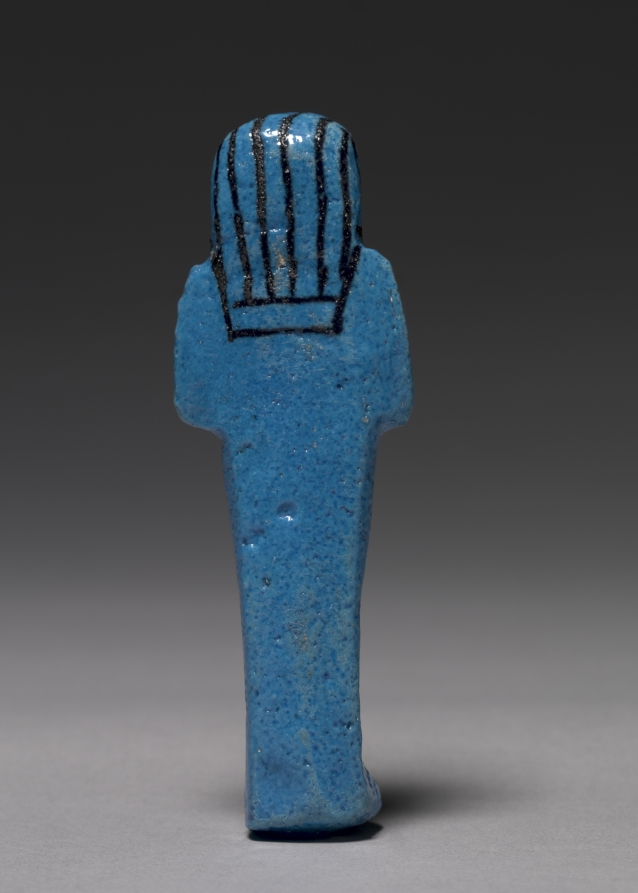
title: Shawabty of Pinudjem I, High Priest of Amen and King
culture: Egypt, Third Intermediate (1069–715 BCE), Dynasty 21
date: c. 990–969 BCE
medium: bright blue faience with purple details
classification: Funerary Equipment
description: This small mummiform funerary figurine was a surrogate for the deceased that performed menial tasks for its owner in the afterlife. Mold-made and decorated with paint, this shawabty contains the name of a king within a cartouche. The vibrant blue color occurs during the firing process as a chemical reaction with the pigments in the faience paste, in this case added copper.